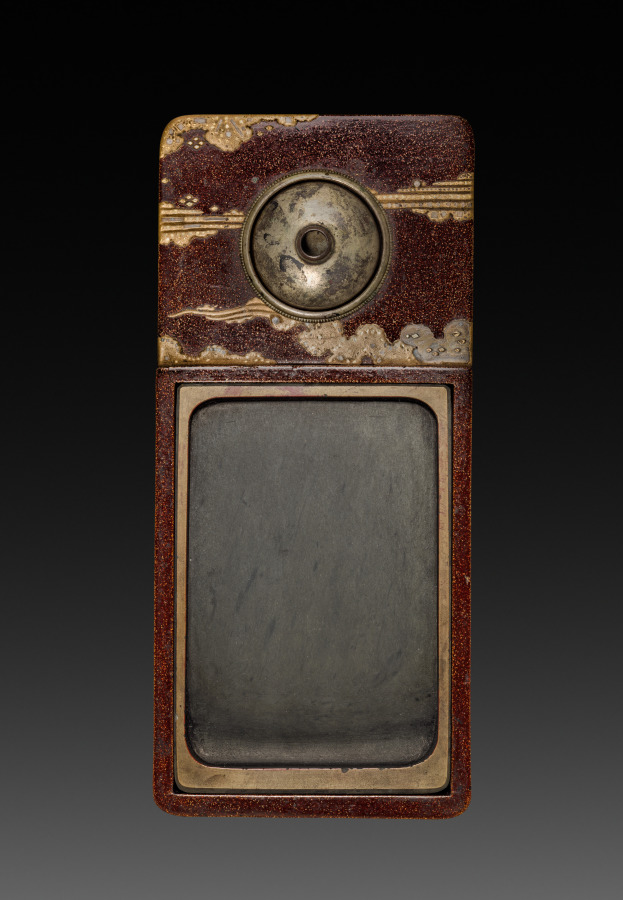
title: Writing Box (Suzuribako) with Phoenix in Paulownia (inkstone and water dropper)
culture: Japan, Momoyama period (1573–1615)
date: c. 1573–99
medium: Lacquer on wood with sprinkled gold and silver powder (maki-e) and gold and silver foil application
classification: Lacquer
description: The only place the mythical phoenix will perch is in the paulownia tree. Along with the dragon, the bird is a symbol of imperial power in East Asia. This box––a container for an inkstone, brushes, and ink––is both functional and lavish, its dramatic effects achieved with a pear-skin ground decoration (nashiji) and sprinkled powder decoration in high relief (takamaki-e).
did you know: The only place the mythical phoenix will perch is the paulownia tree.